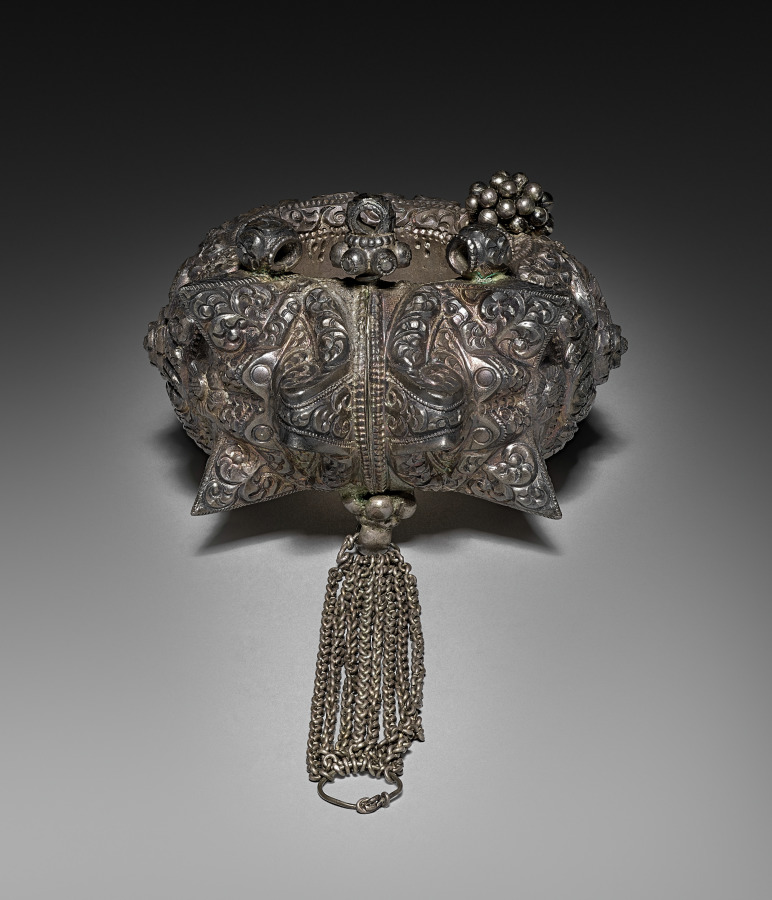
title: Bracelet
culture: Burma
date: 19th Century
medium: silver gilt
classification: Jewelry